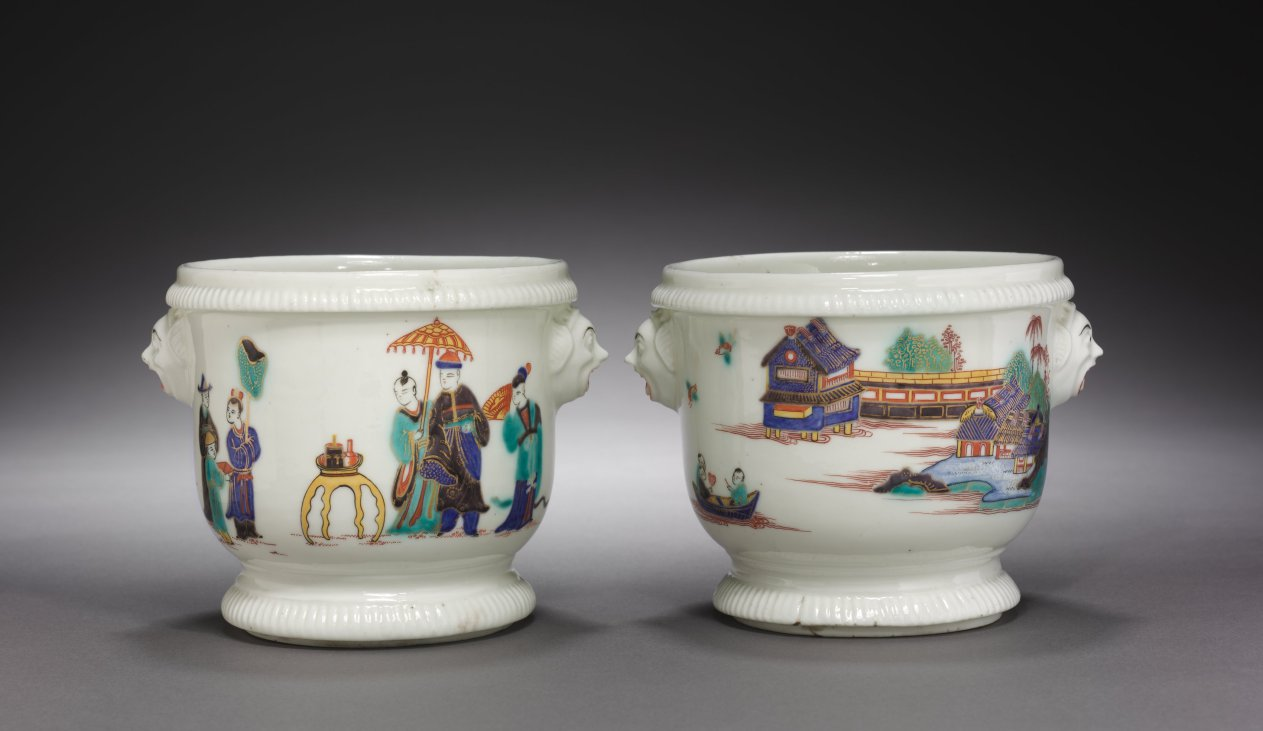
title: Pair of Bottle Coolers (Seaux à rafraîchir)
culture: France, Saint Cloud, 18th century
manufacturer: Saint Cloud Porcelain Factory (French)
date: c. 1730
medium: soft-paste porcelain with enamel and gilt decoration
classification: Ceramic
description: The Saint-Cloud Porcelain Factory was known for its innovation in color. Shades of green and blue are used to paint the main decoration of these bottle coolers, a palette typical of the Chinese porcelain famille verte. The alternating red and gold outlines of the figures and objects is relatively rare and generally only seen on two shapes produced at Saint-Cloud, bottle coolers and cream pots.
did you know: These bottle coolers would have been used to cool glasses or small bottles.